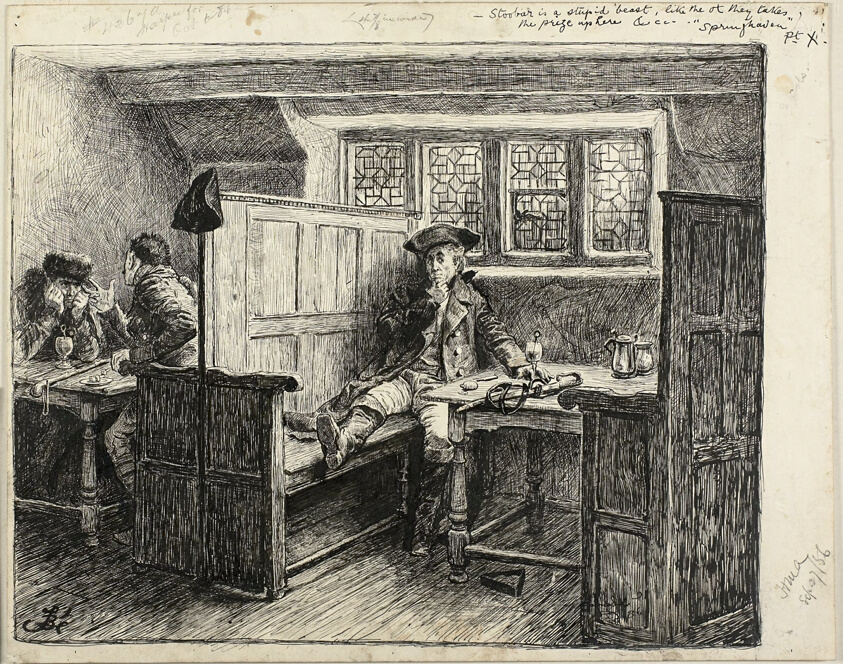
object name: Drawing and Watercolor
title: The Eavesdropper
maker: Frederick Barnard (English, 1846-1896)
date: c. 1886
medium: Pen and black ink, heightened with varnish, on ivory wove card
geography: England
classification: pen and ink drawings; drawings (visual works); prints and drawing